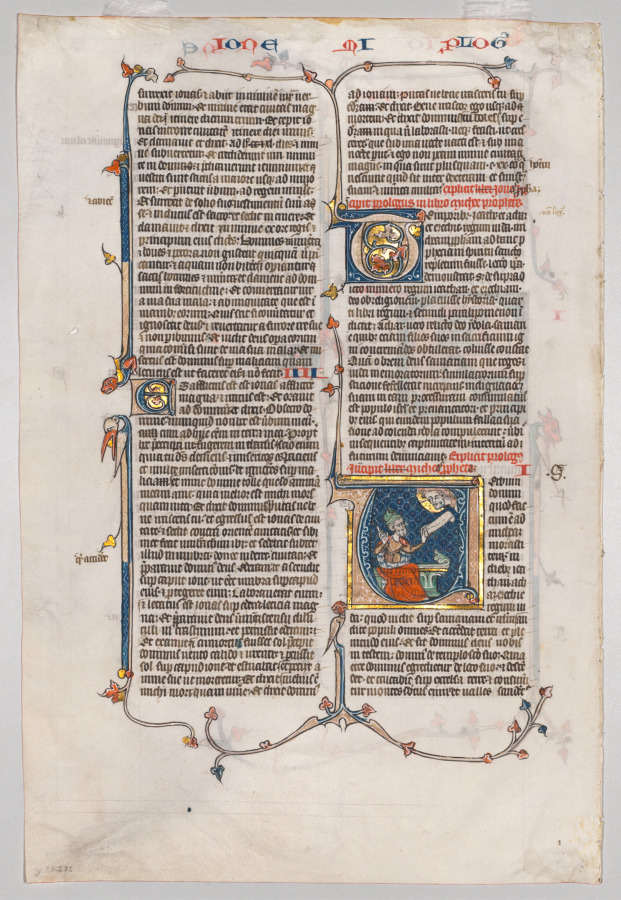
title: Single Leaf from a Bible: Initial E[t factum est] with Jonah Swallowed by the Whale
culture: France, Paris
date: c. 1290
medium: ink, tempera, and gold on vellum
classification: Manuscript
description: This leaf and the bifolium (double-leaf) displayed to the right both come from the same manuscript: a large lectern bible. The decorative scheme consists of a single historiated initial and spiky ivy-leaf tendrils along the margins, a Parisian convention just developing at this time. These "ascenders" and "descenders" originate from two of the initials and meander along the margins as separators and framing devices for the text. This ivy-leaf motif dominated book illumination in Paris through the early 15th century. The interior of the initial E contains a background of geometric patterns (called diapering) against which is set Jonah and the whale and the ancient city of Nineveh, the capital of the Assyrian Empire. The illusionistic effect creates three layers of perspective-the framing initial, the figures, and the background.